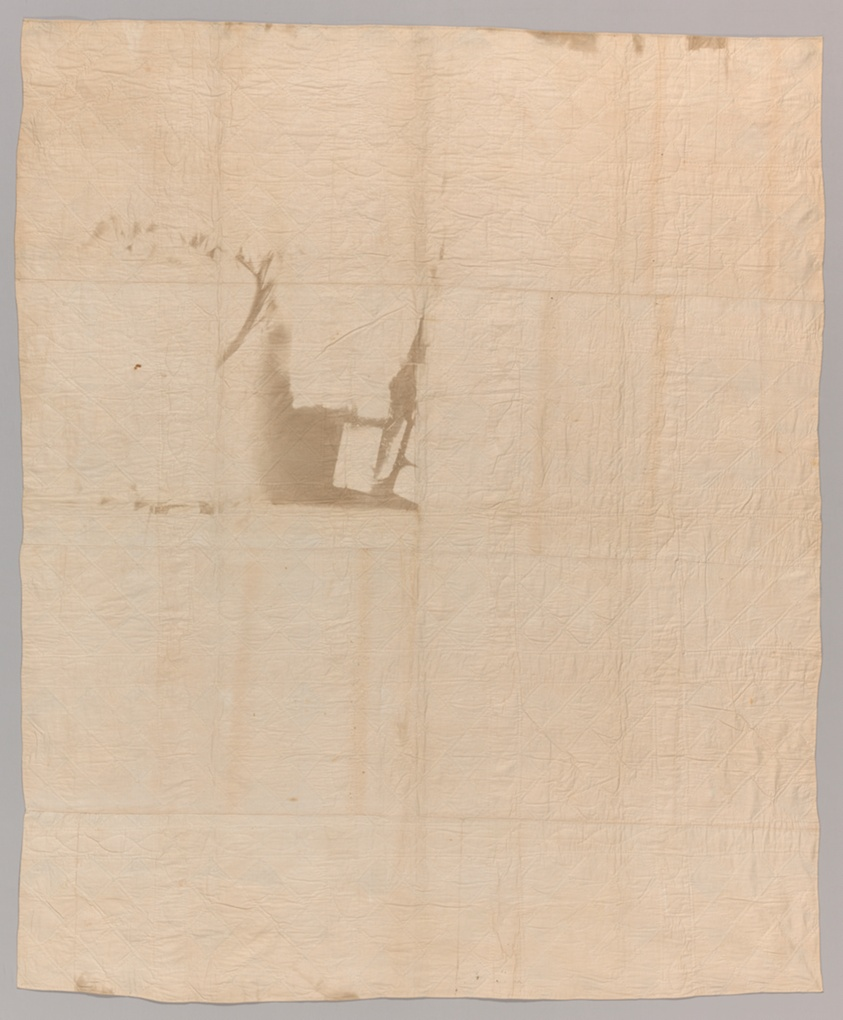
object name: Textile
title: Bedcover ("Album Patch" or "Signature" Quilt)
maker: Possibly Hunderdon County, New Jersey, United States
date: 1847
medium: Cotton, plain weaves; printed; quilted; backed and edged with cotton, plain weave; pieced; printed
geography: United States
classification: needlework - quilt; textile